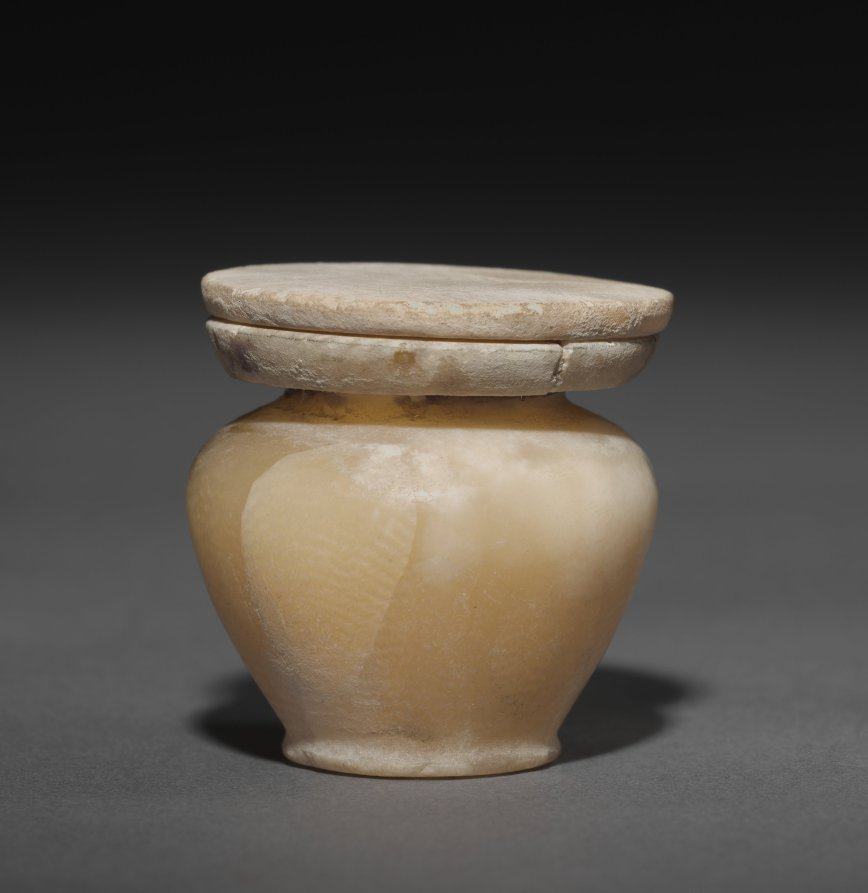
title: Kohl Jar with Lid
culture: Egypt, Middle Kingdom (2040–1648 BCE), Dynasty 12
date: 1980–1801 BCE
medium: travertine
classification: Vessels